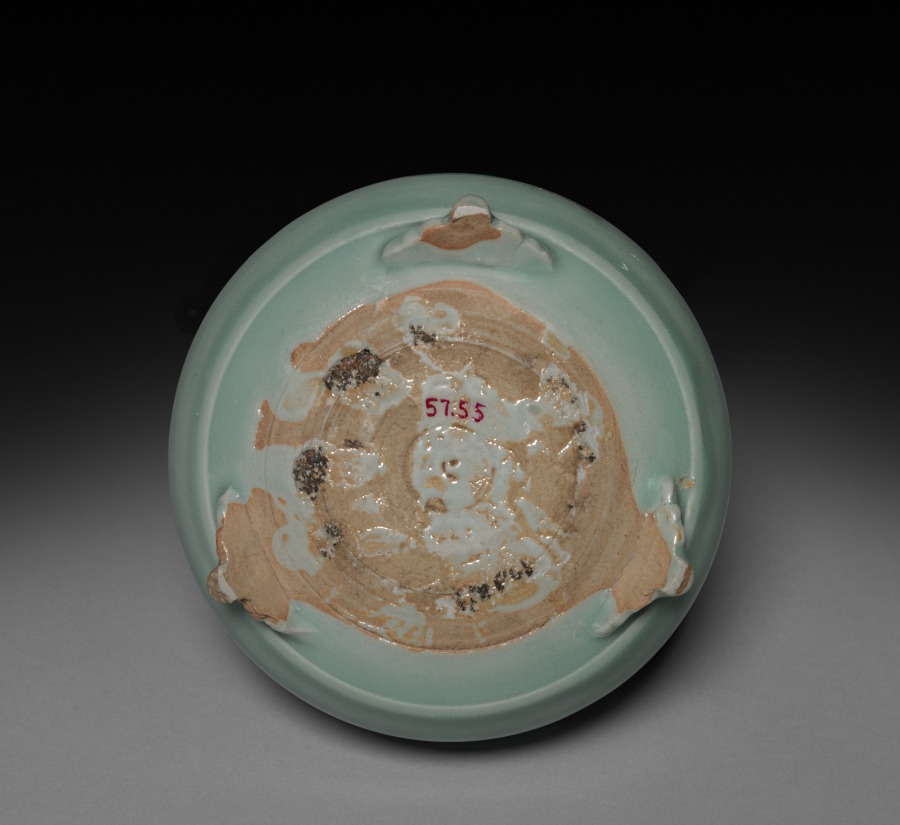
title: Incense Burner: Longquan Ware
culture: China, Southern Song dynasty (1127-1279)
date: S. Sung-Yuan Dynasty, 13th-14th Century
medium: glazed porcelain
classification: Ceramic